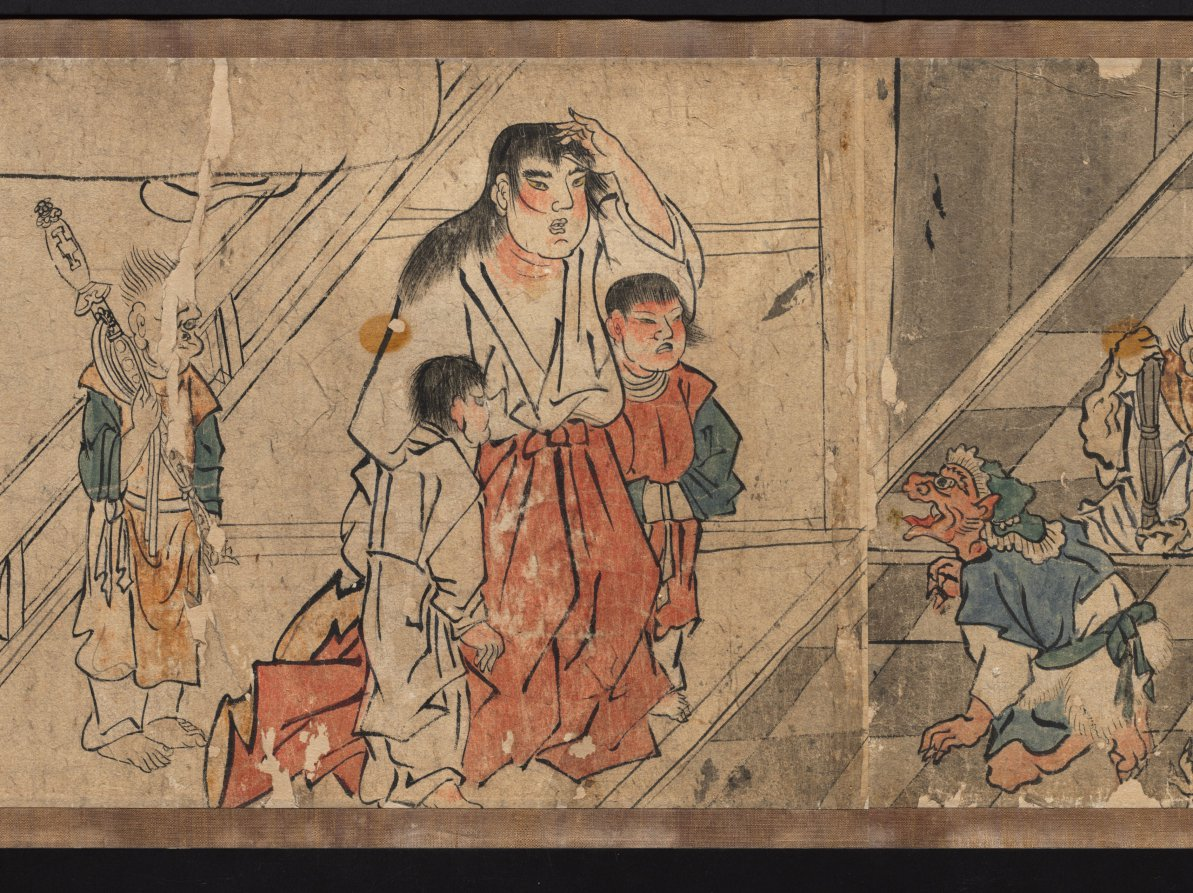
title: Oeyama Engi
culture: Japan, Edo period (1615–1868)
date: 1615–1868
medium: one of a pair of handscrolls; ink and color on paper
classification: Painting